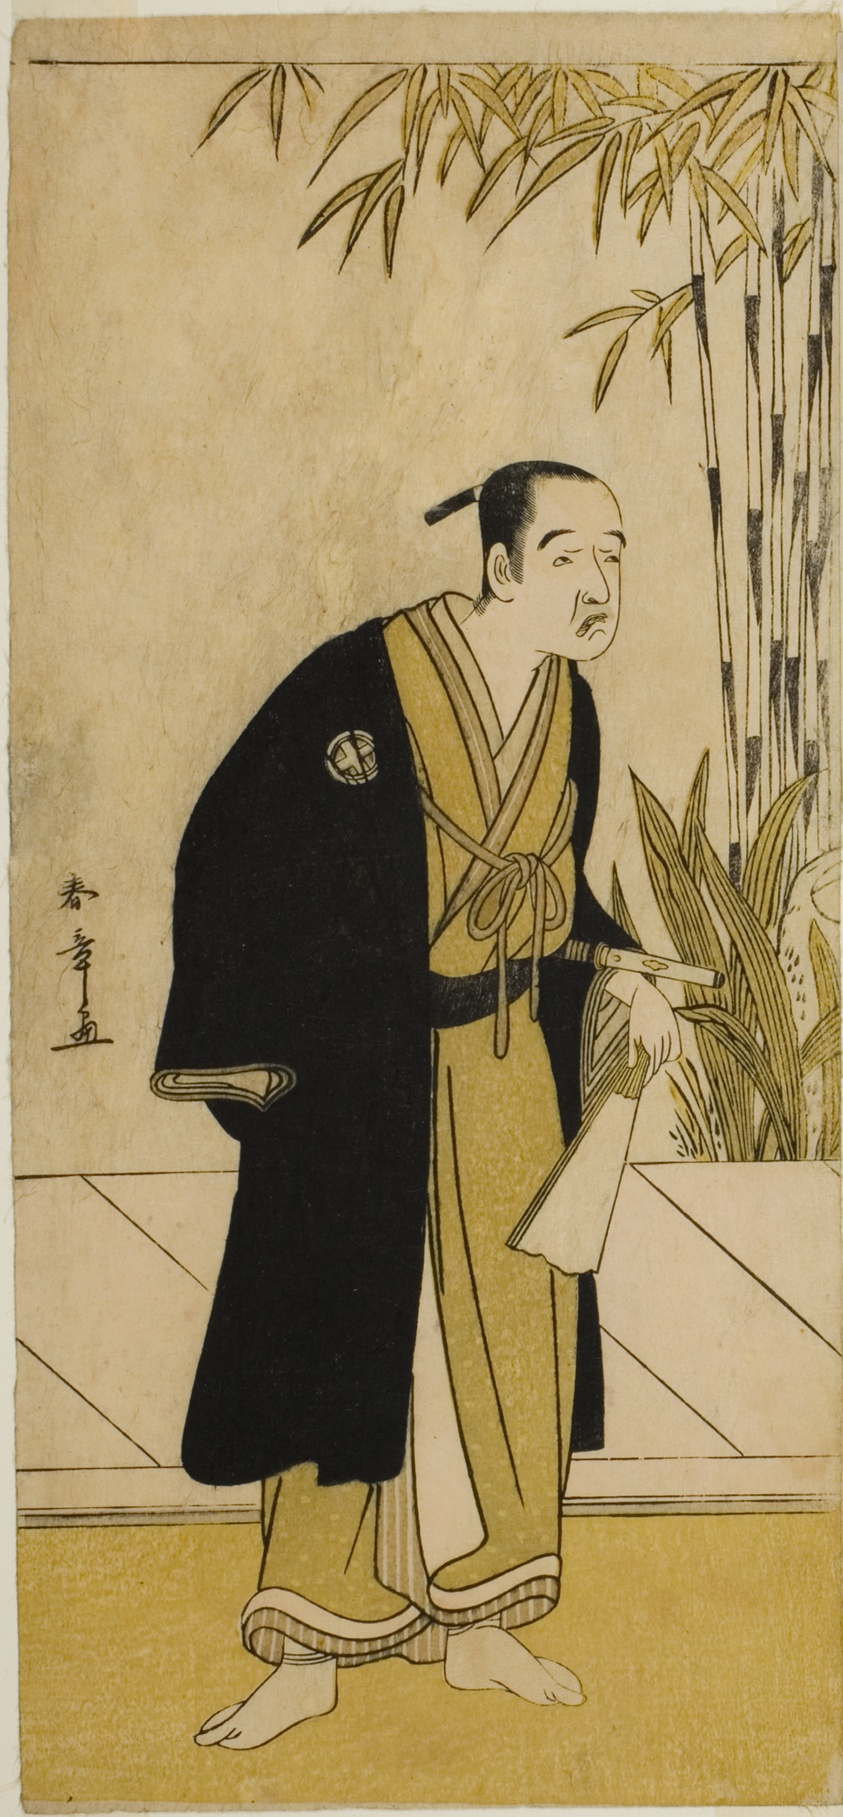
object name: Print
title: The Actor Otani Tomoemon I as Kajino Choan (?) in the Play Hono Nitta Daimyojin (?), Performed at the Morita Theater (?) in the Seventh Month, 1777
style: Japanese (culture or style)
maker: Katsukawa Shunsho 勝川 春章; Japanese, 1726-1792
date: c. 1777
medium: Color woodblock print; hosoban; left sheet of diptych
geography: Japan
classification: woodblock print; print; asian art